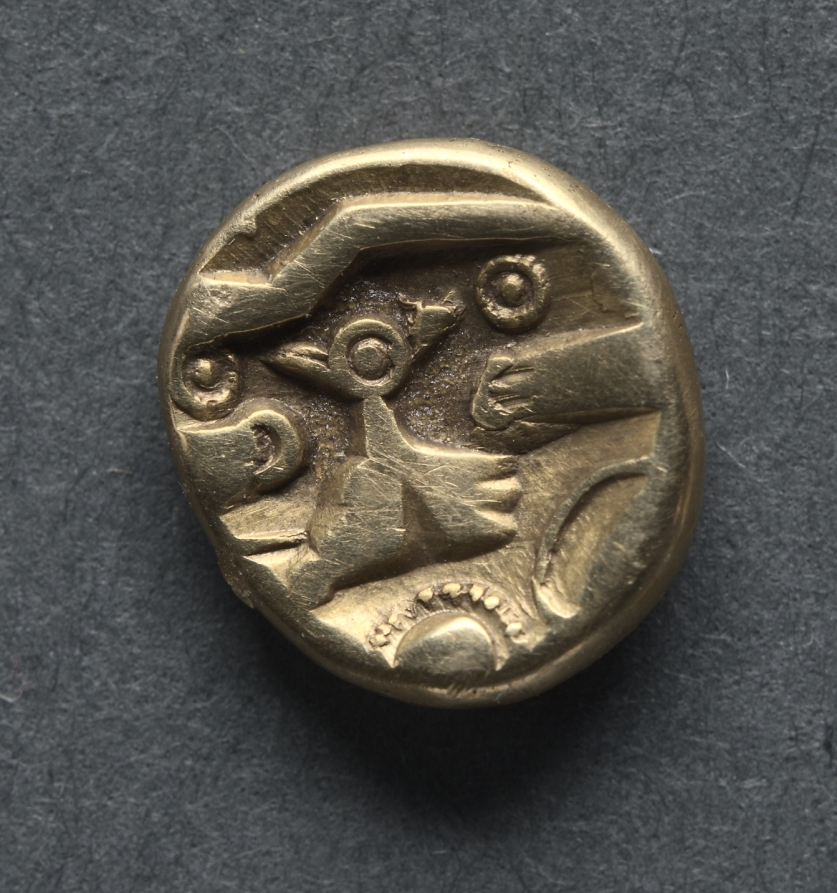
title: Quarter Stater: Tree-like Trophy on Triad of Ringed Pellets (obverse)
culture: England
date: c. 125–20 BCE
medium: gold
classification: Coins